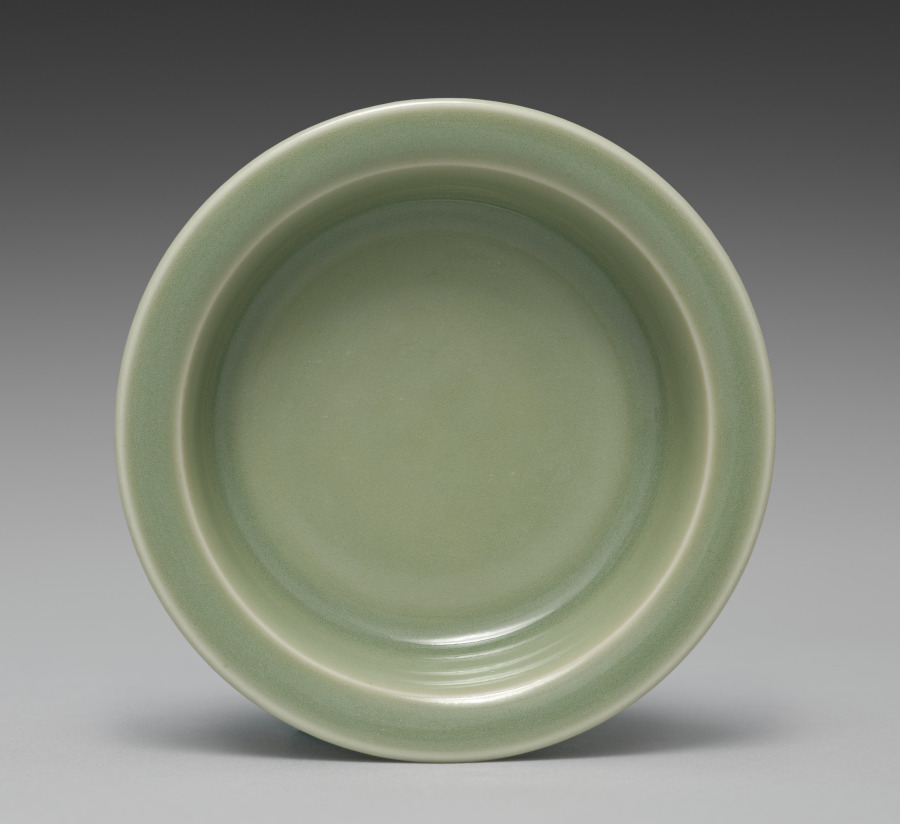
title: Saucer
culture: Japan, Meiji period (1868–1912)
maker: Seifū Yohei III (Japanese, 1851–1914)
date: 1893–1914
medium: One from a set of ten dishes; porcelain with green glaze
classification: Ceramic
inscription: 清風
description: Yohei III’s main output for his sophisticated clientele was in the form of tea sets and dining sets. He created a range of dishes in green glazes. He often produced in pairs, sets of five, or sets of ten. For this set of ten small dishes in a simple, round form that emphasizes the glaze above all, the box lid designates the piece as seiji, or green-glazed porcelain, using a general term for the extensive palette of green glazes often called celadon in English. The box lid further identifies the dishes themselves as tōchō, literally “bean-sized saucers,” a size that makes them suitable for dipping sauces.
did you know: The ten dishes in this set are stored in stacks of five in a two-compartment box.